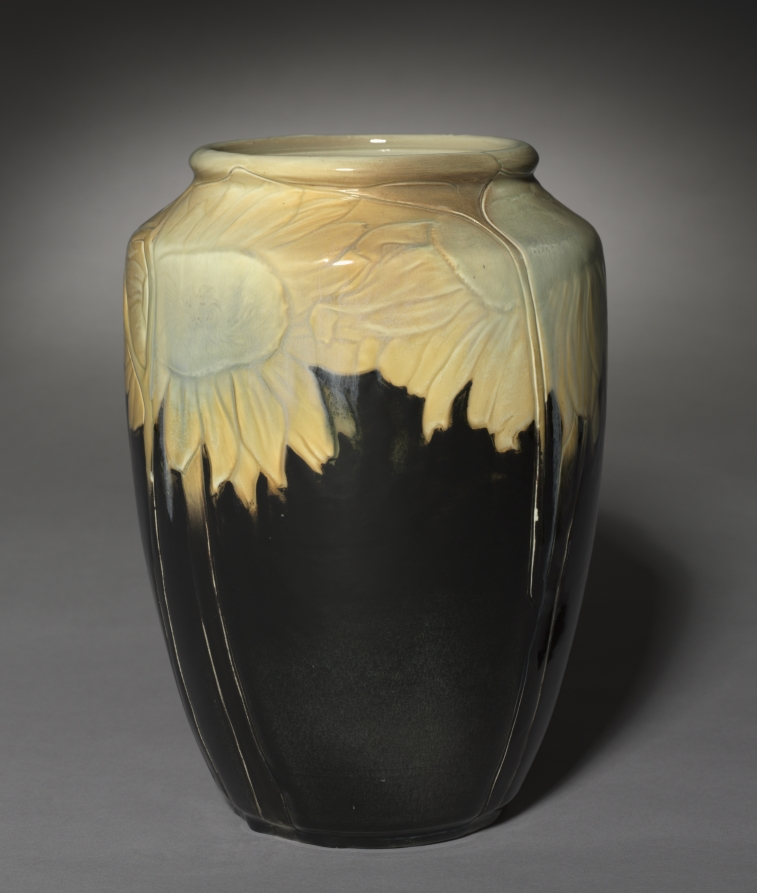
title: Vase Decorated with Sunflowers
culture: America, late 19th Century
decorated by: John D. Wareham (American, 1871–1954)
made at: Rookwood Pottery Company (American, established 1880)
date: 1899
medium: earthenware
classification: Ceramic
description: Floral and animal motifs are common decoration found on vessels designed by John D. Wareham for the Cincinnati-based Rookwood Pottery Company. Here, bright yellow sunflowers around the mouth of the vase are enhanced by stark black.